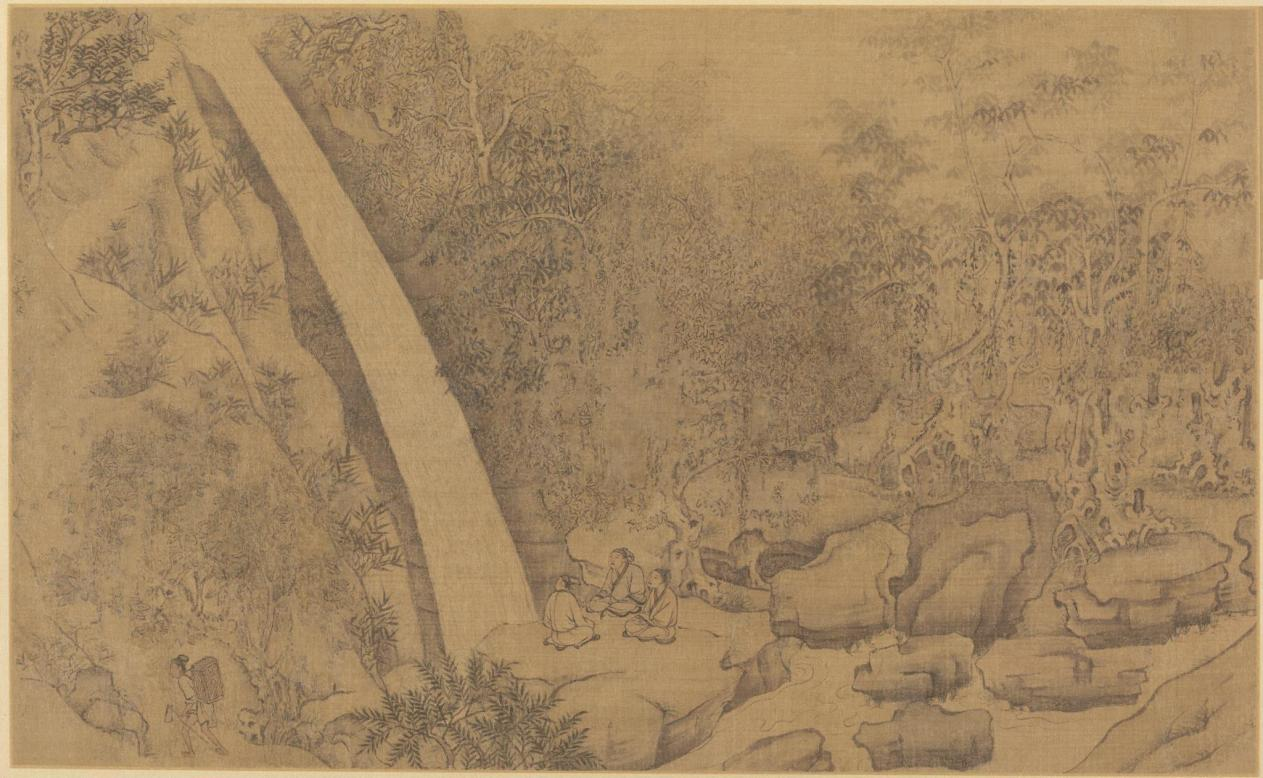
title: Dwelling in the Longmian ("Sleeping Dragon") Mountains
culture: China, Song dynasty (960-1279) - Yuan dynasty (1271-1368)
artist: follower of Li Gonglin (Chinese, c. 1049–1106)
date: 1100s-1200s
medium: handscroll mounted as an album leaf; ink and color on silk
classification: Painting